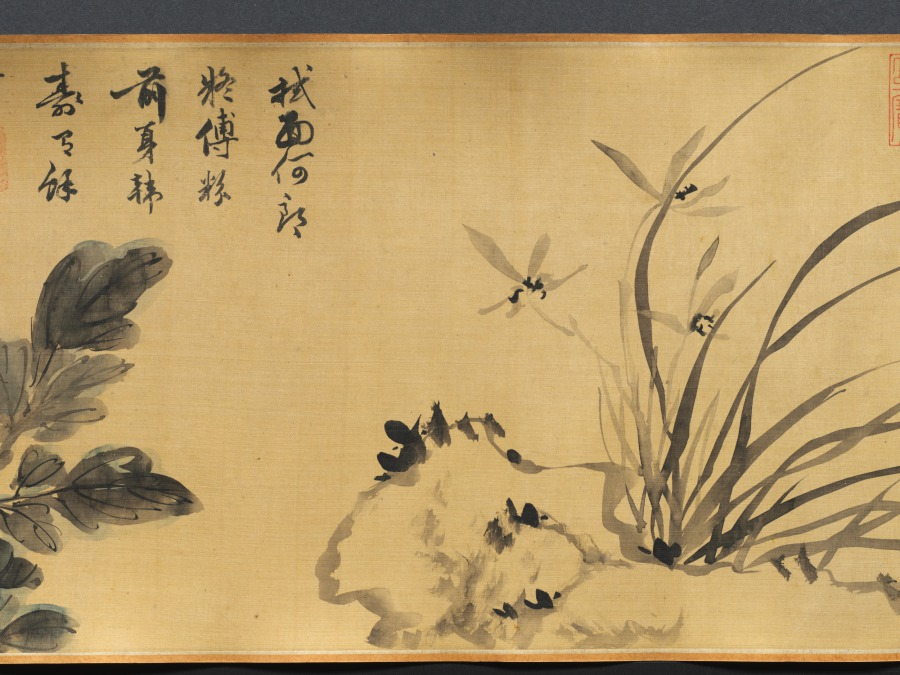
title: Flowers of Four Seasons, with Poems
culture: China, Ming dynasty (1368–1644)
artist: Wang Guxiang (Chinese, 1501–1568)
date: 1531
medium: handscroll; ink and light color on silk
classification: Painting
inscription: Artist's inscription, signature, and 15 seals. Ink Orchids. Sewn as pendants for the man of worth, swaying quiety, fragrance in the valley. [seal] Hsiao-chu ts'un Peony. Wiping his face, the young gentleman Ho [Ho Yen of Wei, Three Kingdoms] appears to have been powdered. His previous life was the perfume-stealing Han Shou [of Chin, 265–419 CE], the fragrance still lingers. [seal] Ts'un-wu chai. Flowering Crab Apple, New Bamboo. Shao-lin [Du Fu, 712–770] had to put down his brush. [Flowering Crab Apple]. Yü-k'o [Wen T'ung, d. 1079) in vain wrote poems about [Bamboo]. [seal] Yu-shih. Lotus Flowers. When she turns her head, half-hidden by a fan, and casts a glance, all the beautiful women become colorless. [seal] K'ang yüeh huai. Loquat. Ripeness in summer. [seal] Lu-chih. Pomegranate Flower. Whenever I remember you I will send my thoughts, but where have you gone--the [skirt] of pomegranate red? [seal] Wu-ho Sheng. Day Lily. Plant the day lily to forget sorrow. [seal] Yu-shih. Chrysanthemum. The untrammelled joy at the eastern fence. [seal] Lu-chih. Begonia. Comparing it to the beauties of Spring, and spreading them out as trimming for the stone steps. [seal] Yu-shih. Hibiscus. In recent years I have always enjoyed looking at flowers; instead of dark red I preferred pink ones. [seal] Jen-sheng i-lou. Narcissus, Camellia. The jade girdle left behind at Lo River. [Narcissus]. The precious pearls glitter before Spring. [Camellia]. [seal] Lu-chih. Heavenly Bamboo (Nandina domestica). A single branch in the wintry season. [seal] K'ang yüeh huai. Plum. Fragrant snow in the Lo-fou Mountains. [seal] Ts'un-wu chai. In the eleventh lunar month of the hsin-mao year of the Jiaqing era [1531], [I] imitated the boneless style of Yüan masters in sketching from life. Guxiang [seals] Yu-shih; Lu-chih. Translated by Wai-kam Ho/Lingyun Shih Liu (1980)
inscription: 2 colophons and 23 additional seals: 1 colophon dated 1632, and 2 seals of Li Jih-hua [Li Rihua] 李日華 (1565–1635); 1 colophon and 2 seals of Xiang Shengmo 項聖謨 (1597–1658); 3 seals of Liang Qingbiao 梁清標 (1620–1691); 6 seals of the Jiaqing 嘉慶 emperor (r. 1796–1820); 9 seals of Ch'eng Ch'i [Cheng Qi] 程琦 (1911–1988)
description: In this painting, flowers are loosely arranged by the seasons: narcissus and peony represent early spring; yellow loquat and lotus, summer; chrysanthemum, autumn; and the plum and evergreen bamboo, winter. The artist added to each flower a poetic line of calligraphy associating each plant with a historic or legendary figure. For example, the chrysanthemum, along with the line “The untrammeled joy at the eastern fence,” refers to the poet Tao Yuanming (died AD 427) who enjoyed chrysanthemums at the eastern fence in his garden. The scroll illustrates Wang Guxiang’s mastery of free brushwork, combining light monochrome ink with transparent colors. In his inscription, Wang says he used the “boneless” style without outlines as developed during the Yuan dynasty (1279–1368). Wang was a native of Changzhou, a city in southeast China known for its rich flora and fauna, and flower-and-bird painting tradition.